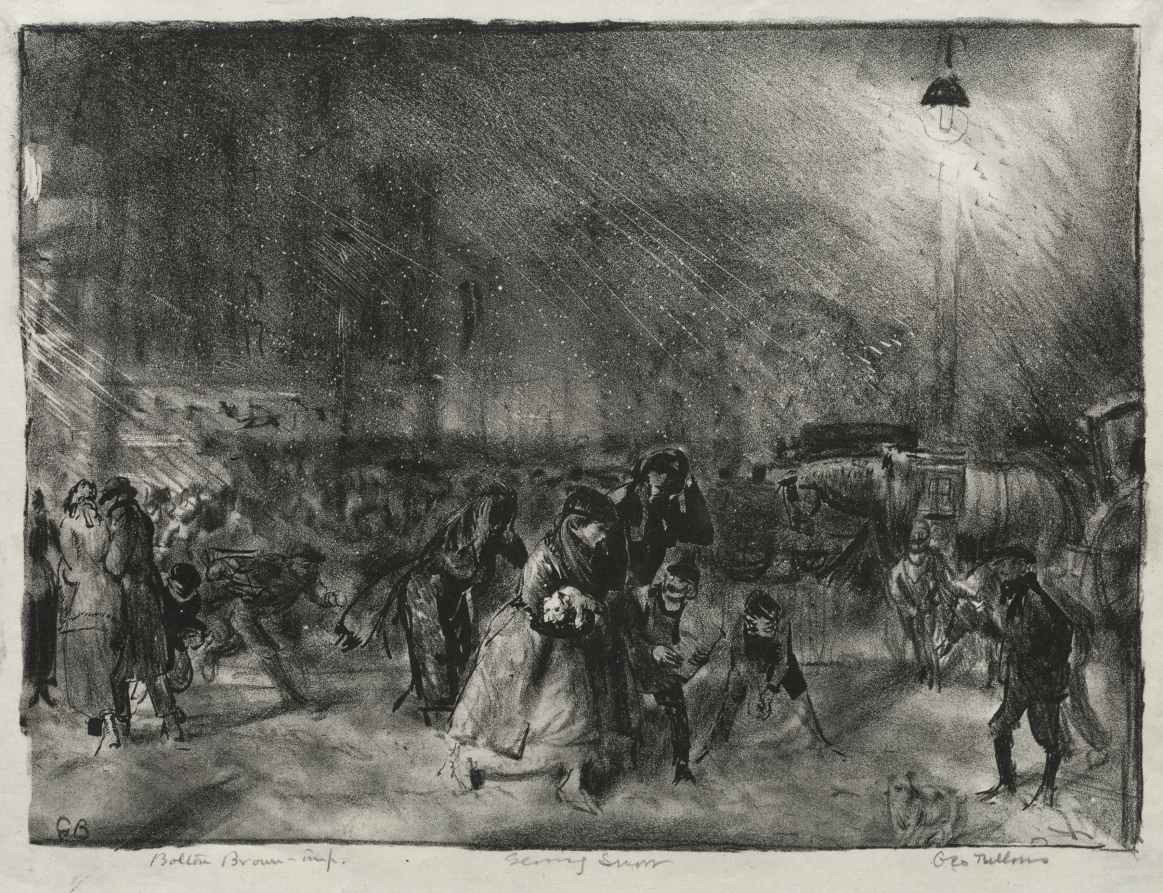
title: Evening Snow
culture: America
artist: George Bellows (American, 1882–1925)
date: 1921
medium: lithograph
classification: Print